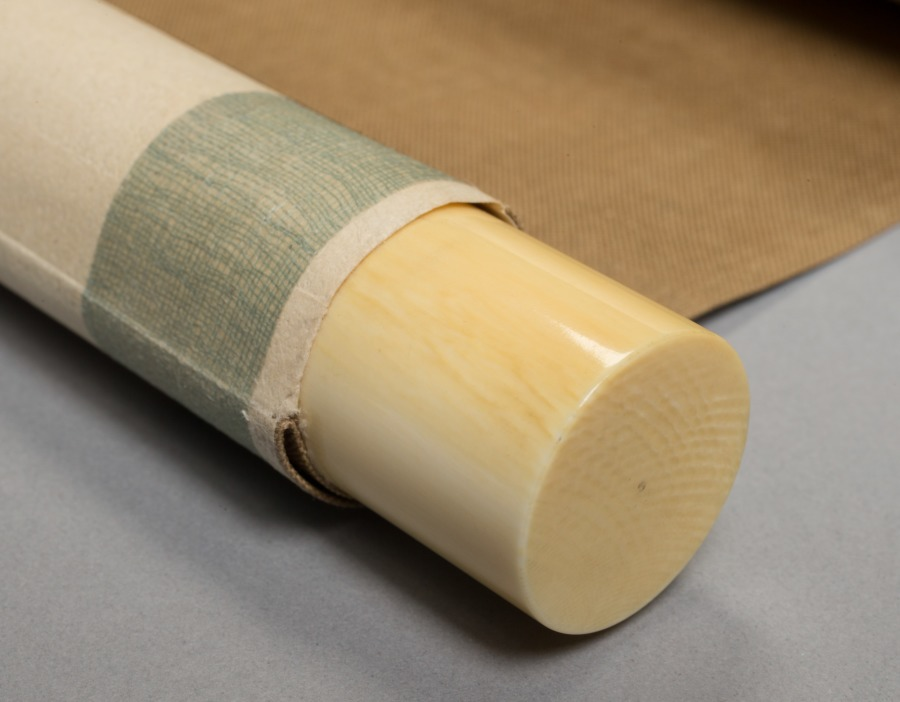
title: Hotei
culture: Japan, Muromachi period (1392–1573)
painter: Yamada Dōan I (Juntei) (Japanese, d. 1573)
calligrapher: Tōkei Jakurin (Japanese, dates unknown)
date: mid-1500s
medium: hanging scroll; ink on paper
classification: Painting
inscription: 桃渓道人 題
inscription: 大肚兮濶襟 寶聚嚢底沵 通霄別有路 勿向指尖尋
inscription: 落款 桃渓之印 若霖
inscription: 印章 山田氏道安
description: Hotei is a semilegendary figure who may have lived from the late 800s to the early 900s. He later became prominent in Chan (or Zen, in Japanese) Buddhist literature. He epitomizes the freewheeling figure outside the mainstream monastic system—in which people strive for enlightenment through prescribed methods—who nonetheless attains a high level of spiritual awakening. The inscription warns against seeking enlightenment by conscious effort: Big stomach, gaping garment, Treasures gathered deep in the bottom of his bag, Passing through the sky is another road, Do not seek that to which his fingertip points.